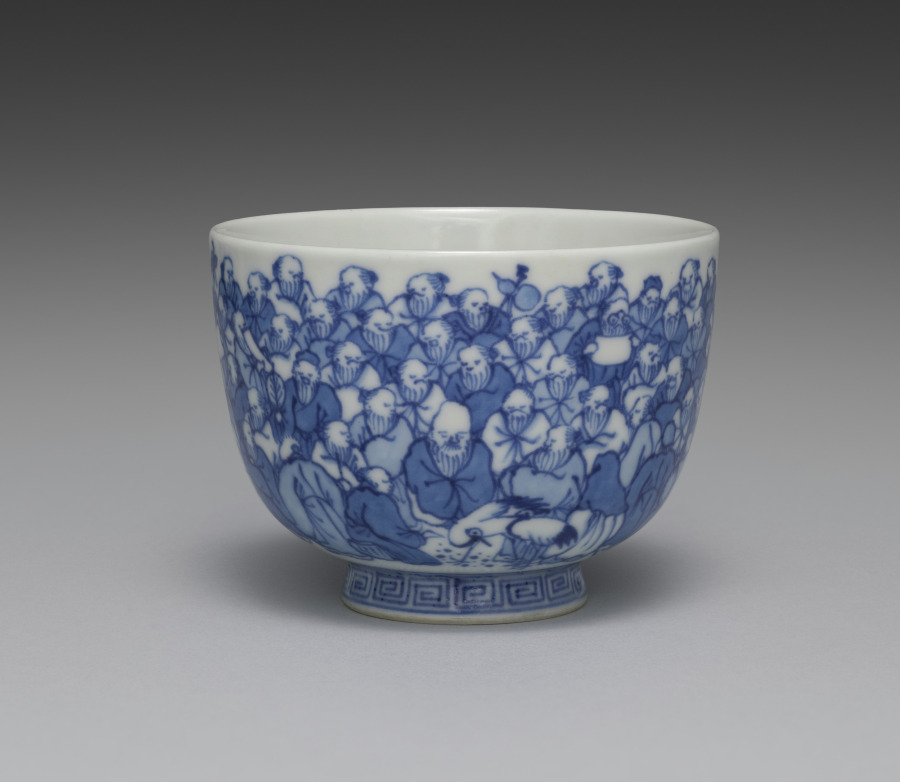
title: Teacup from Teacups with a Hundred Sages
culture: Japan, Meiji period (1868–1912)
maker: Seifū Yohei III (Japanese, 1851–1914)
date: 1893–1914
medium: One from a set of five teacups; porcelain with underglaze blue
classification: Ceramic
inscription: 清風造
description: Each of these five teacups has a painting of identical design in underglaze blue, but as the tiny figures are drawn entirely by hand, each cup has its own personality. The theme of the sencha cups is an assembly of sages or immortals, literally “a hundred venerable [people]” (hyakurō). The myriad figures crowd the scene in groups. The god of longevity, with his tall forehead, sits with his cranes, having flown in from Mt. Penglai on the Isle of the Immortals. Seven long-bearded sages sit around a stone table, chatting and drinking; one is seated on an enormous gourd. Of course, there is a stack of books on the table, and elsewhere, scrolls are being written upon or read—in one case held very close by a sage who is wearing glasses. The design was enormously popular in ceramics made for those engaged in literati culture.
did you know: Seifū Yohei III (1851–1914) produced many works for tea gatherings where people drank Chinese-style leaf-tea (sencha).